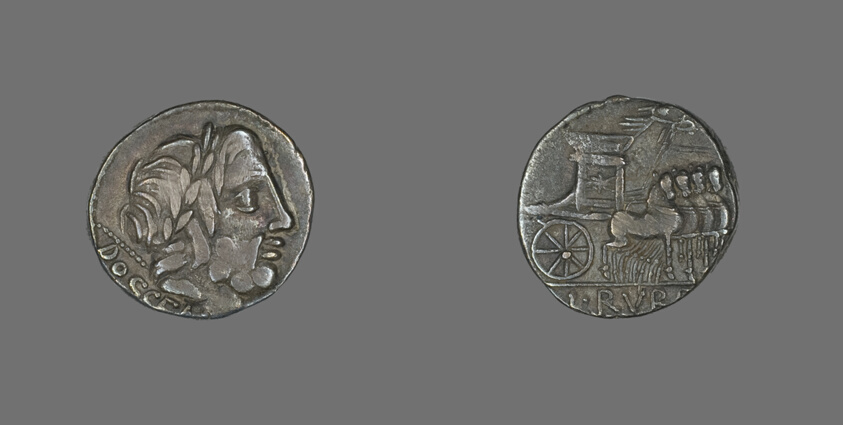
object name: Coin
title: Denarius (Coin) Depicting the God Jupiter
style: roman (ancient, style or period), ancient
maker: Roman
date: about 87 BCE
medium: Silver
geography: Roman Empire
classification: coin; ancient art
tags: Chariots